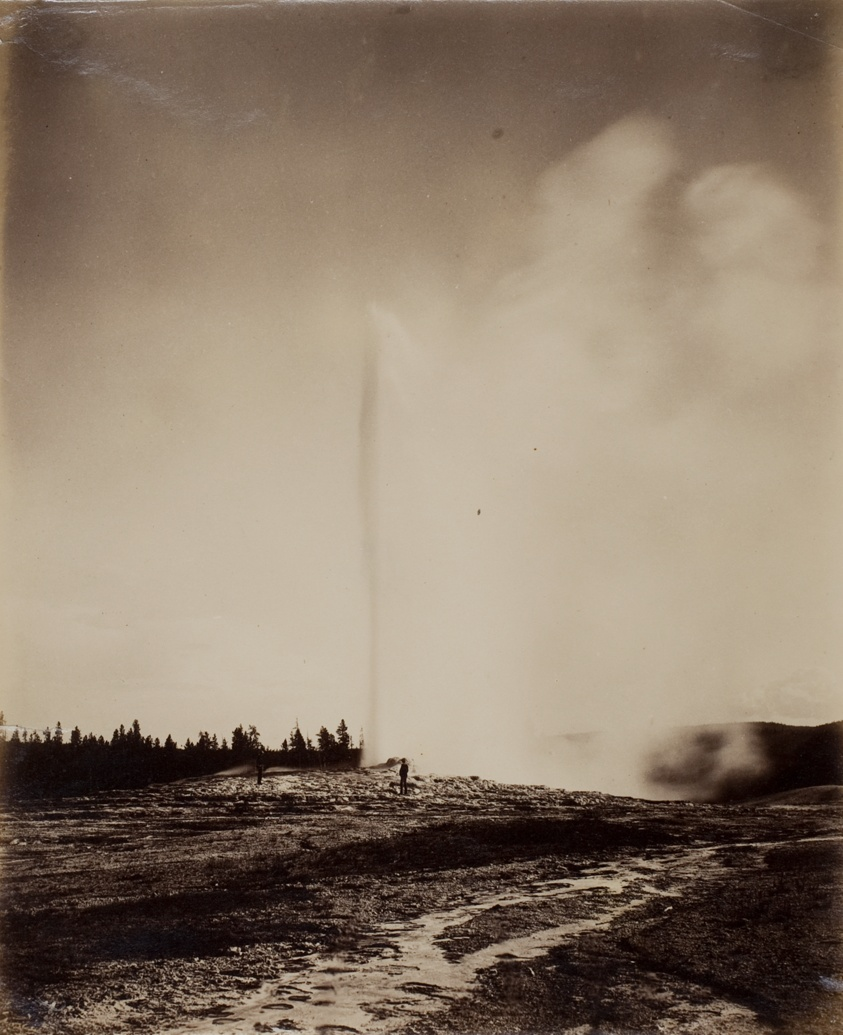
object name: Photograph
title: Old Faithful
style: 19th century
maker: William Henry Jackson (American, 1843–1942)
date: 1871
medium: Albumen print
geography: United States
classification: photograph; albumen silver print; photography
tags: landscapes